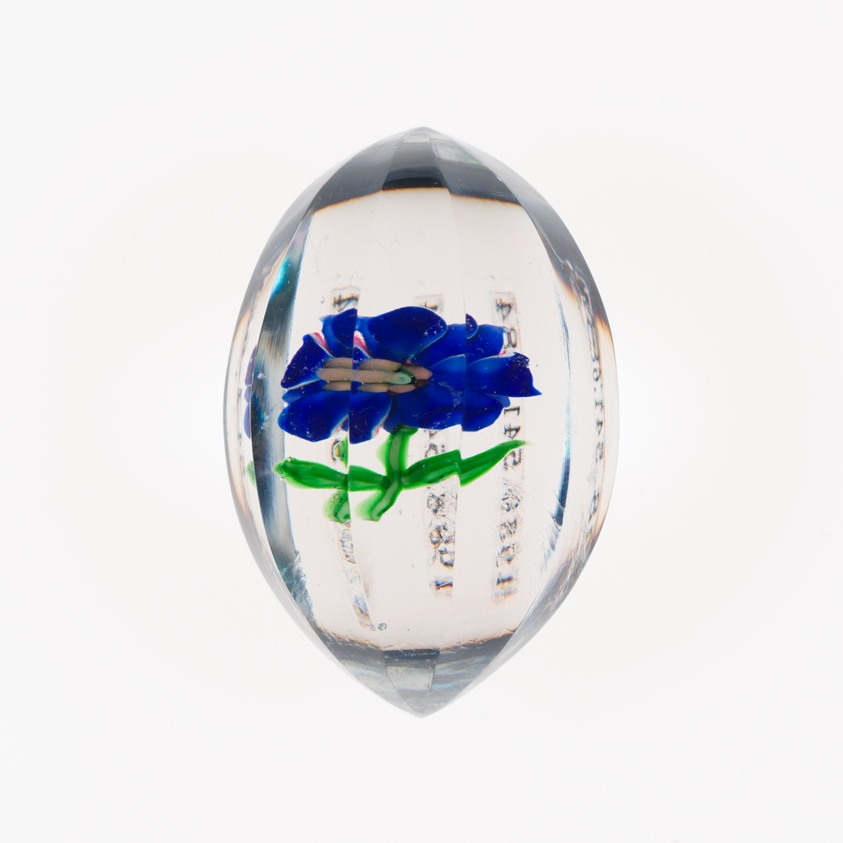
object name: Glass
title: Handcooler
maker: Saint-Louis Glassworks (Cristalleries de Saint-Louis); Lorraine, France, founded 1586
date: c. 1845–60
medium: Glass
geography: France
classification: paperweight; glass